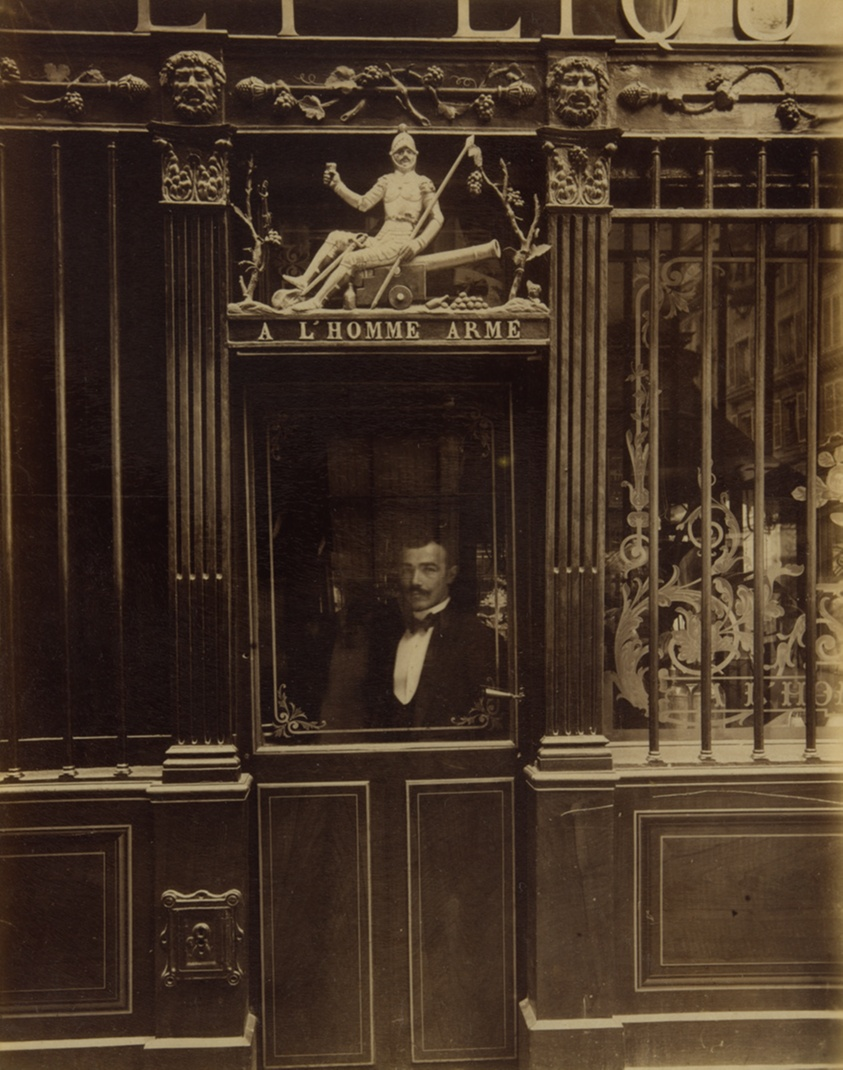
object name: Photograph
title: Cabaret de l'Homme Armé, Rue des Blancs-Manteaux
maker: Jean-Eugène-Auguste Atget (French, 1857–1927)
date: 1900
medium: Albumen print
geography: France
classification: photograph; albumen silver print; photography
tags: Paris